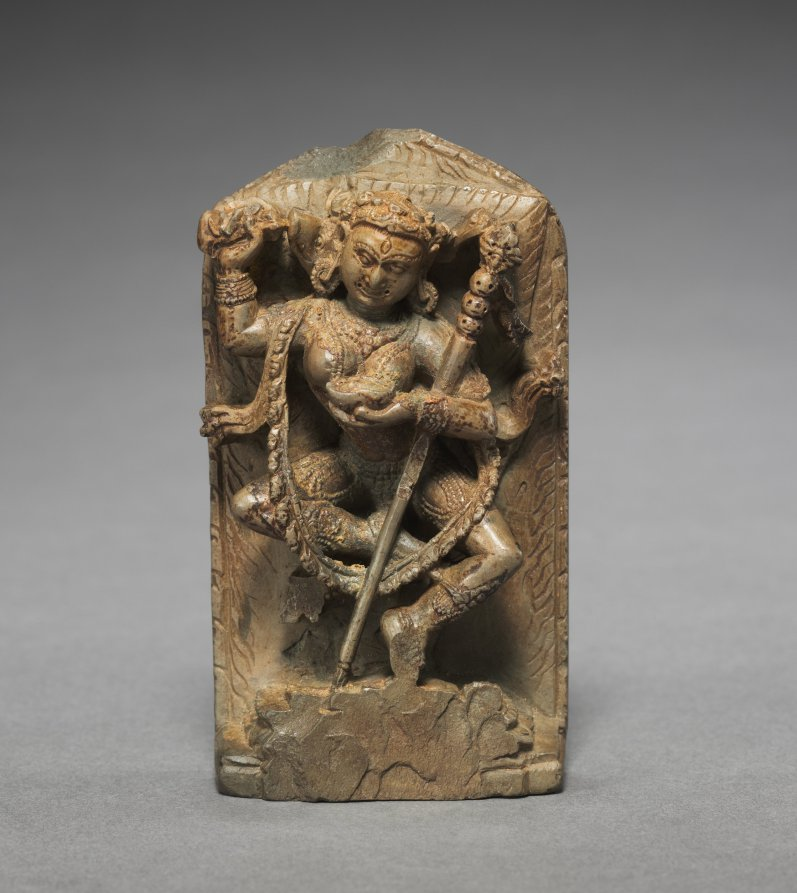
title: Vajravarahi: Dancing Tantric Buddhist Female Deity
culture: Nepal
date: 1000s–1100s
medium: Possibly kaolin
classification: Sculpture